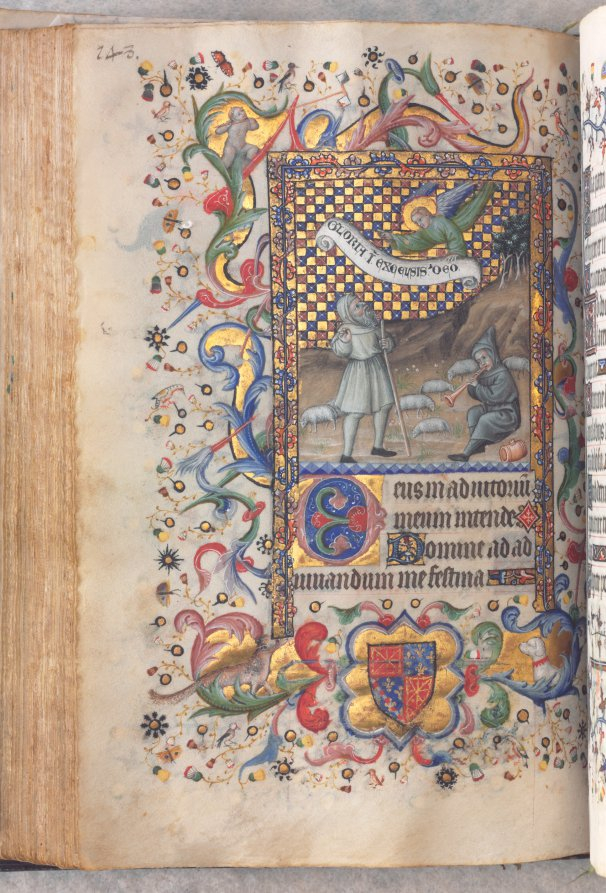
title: Hours of Charles the Noble, King of Navarre (1361-1425): Annunciation to the Shepherds (Tierce), fol. 74 (verso)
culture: France, Paris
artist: Master of the Brussels Initials and Associates (French)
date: c. 1405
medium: ink, tempera, and gold on vellum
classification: Bound Volume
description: This precious volume was obviously highly prized by its owner, the French-born King of Navarre, who had his coat of arms painted on no less than twenty folios. Rather than directly commissioning this manuscript from a specific workshop, it seems that Charles the Noble acquired his book of hours -- perhaps ready-made for the luxury market -- while on a trip to Paris in 1404-05. A collaborative effort, six painting styles are evidenced within the pages of this codex, those of two Italians, two Frenchmen, and two Netherlanders. The painter who was responsible for the planning and decoration of the book, and who produced seventeen of the large miniatures, was a Bolognese artist known as the Master of the Brussels Initials. His principal assistant, responsible for most of the borders, was a Florentine who signed his name "Zecho" da Firenze on folio 208 verso.